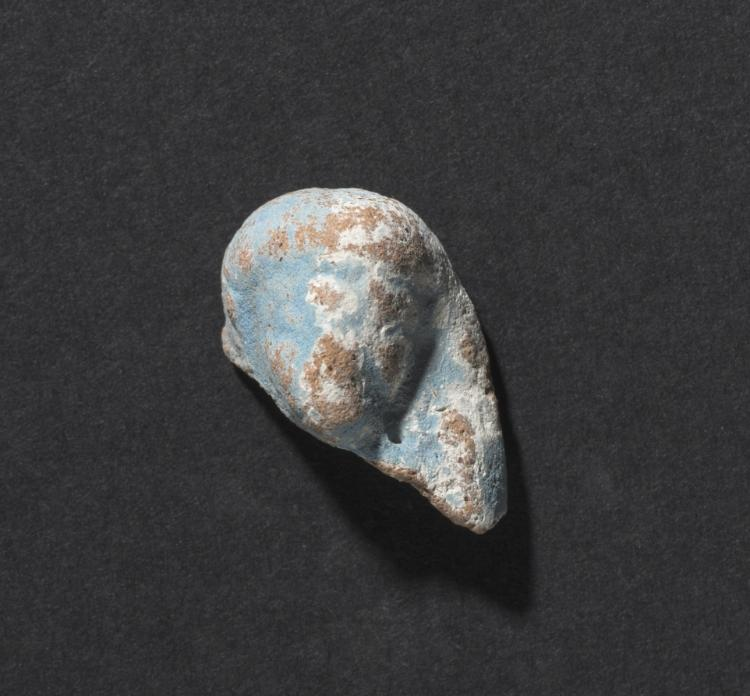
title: Shawabty of Ditamenpaankh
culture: Egypt, Late period (715–332 BCE), Dynasty 25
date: 715–656 BCE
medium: terracotta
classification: Funerary Equipment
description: High demand for shawabtys in the Late Period, a time when as many as 400 or more shawabtys were placed in the tomb with the deceased, gave rise to a specialized container for storing them: the shawabty box. This example is inscribed for the lady of the house, Ditamenpaankh, and was probably one of a pair originally made for her. The single-masted boat on the box's lid is perhaps an allusion to the pilgrimage of the deceased to the holy city of Abydos, the cult city of Osiris, king of the dead. The shawabtys inside are crude, mass-produced examples cast in an open mold. Made of terracotta, their blue paint imitates more costly shawabtys made of faience. As for the shawabty spell, it has been removed from its traditional location on the shawabty's front and relocated onto the sides of box, where it needed only to be written once, thus expediting production.